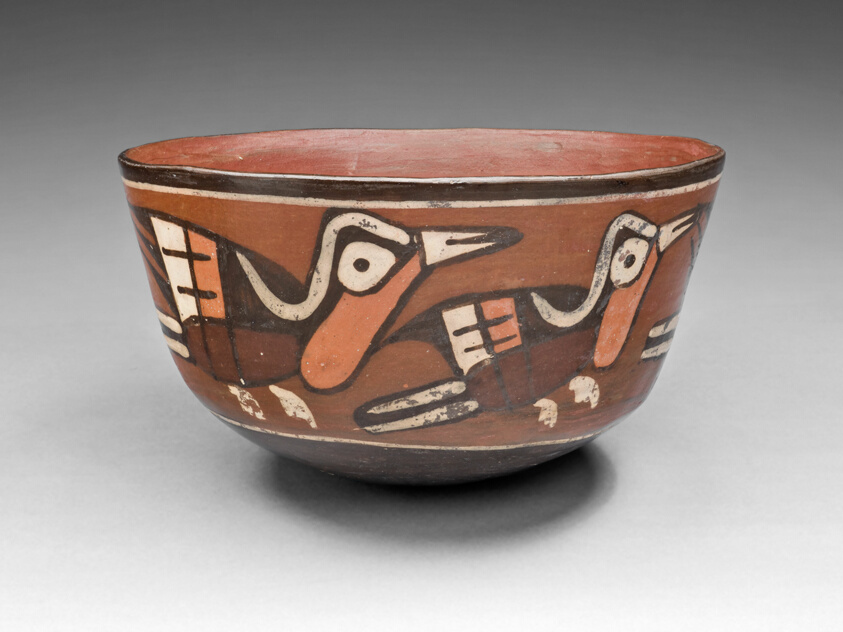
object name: Vessel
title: Bowl Depicting Birds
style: nazca, early intermediate period, Pre-Columbian, americas, Arts of the Americas, andean, andes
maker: Nazca; South coast, Peru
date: 180 BCE–500 CE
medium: Ceramic and pigment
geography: Nazca Valley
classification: bowl; earthenware; art of the americas; ceramics; vessel